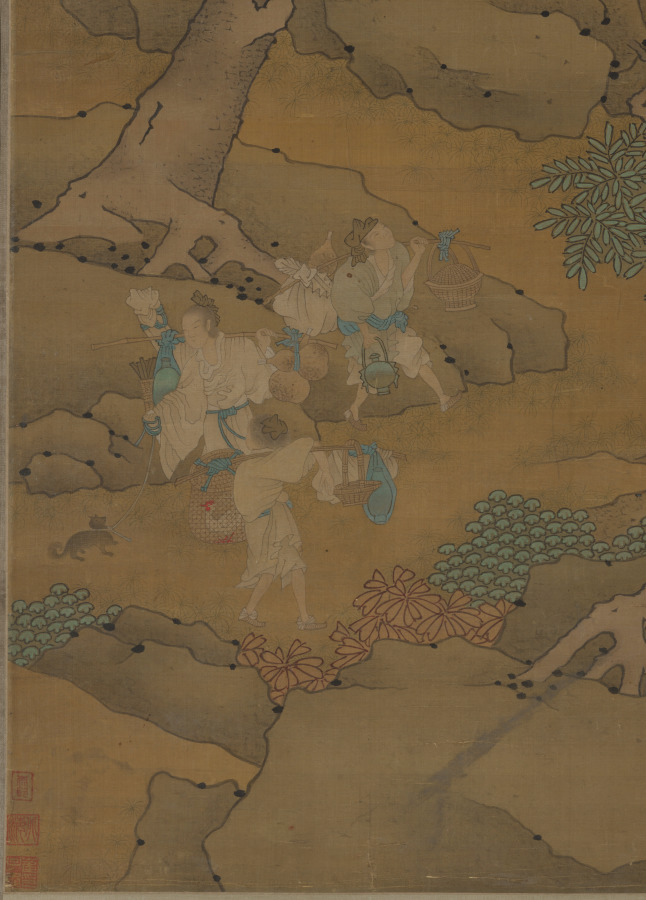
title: Xu Jingyang Moving His Family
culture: China, Ming dynasty (1368–1644)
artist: Cui Zizhong (Chinese, 1574–1644)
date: 1644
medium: Hanging scroll; ink and color on silk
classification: Painting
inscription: Artist's 2 seals: Pei-hai, Cui Zizhong yin.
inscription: 9 additional seals: 2 of Xiang Yuan (18th-19th c.); 1 of Tang Zuomei (late 18th-19th c.); 1 of Zhang Heng 張珩 (1915-1963); 1 of C. C. Wang 王季遷 (1907–2003); 4 unidentified.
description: Xu Jingyang was a dedicated fourth-century Confucian official who allegedly turned into a Daoist immortal. This scroll depicts the legend that when he attained immortality, he took his entire household, including chickens and dogs, to paradise. Cui Zizhong’s painting style intentionally referenced ancient masters. Typical of the pre-Song dynasty landscape tradition, there is the use of blue and green colors and an emphasis on outline rather than texture. While the trembling outlines are reminiscent of earlier painters, the flickering light on rocks and trees is a stylistic feature of Cui’s own time.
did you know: Xu Jingyang, wearing red, is in the upper register of figures, while below his servants transport a rooster, dog, and other supplies.